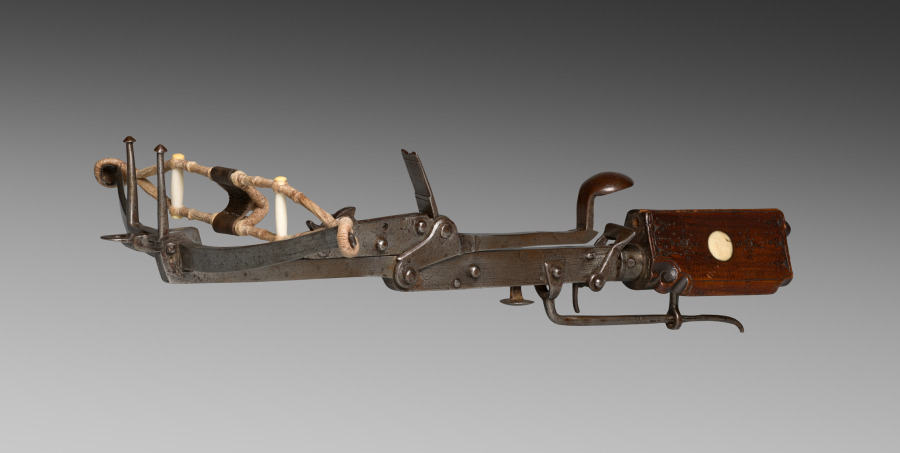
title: Pellet Crossbow for a Child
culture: Germany, early 17th Century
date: c. 1600–1650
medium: wood, bone inlay, steel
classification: Arms and Armor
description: This crossbow, made for the use of a small child, was designed to throw small stones or pellets. The bow string is an accurate replacement.